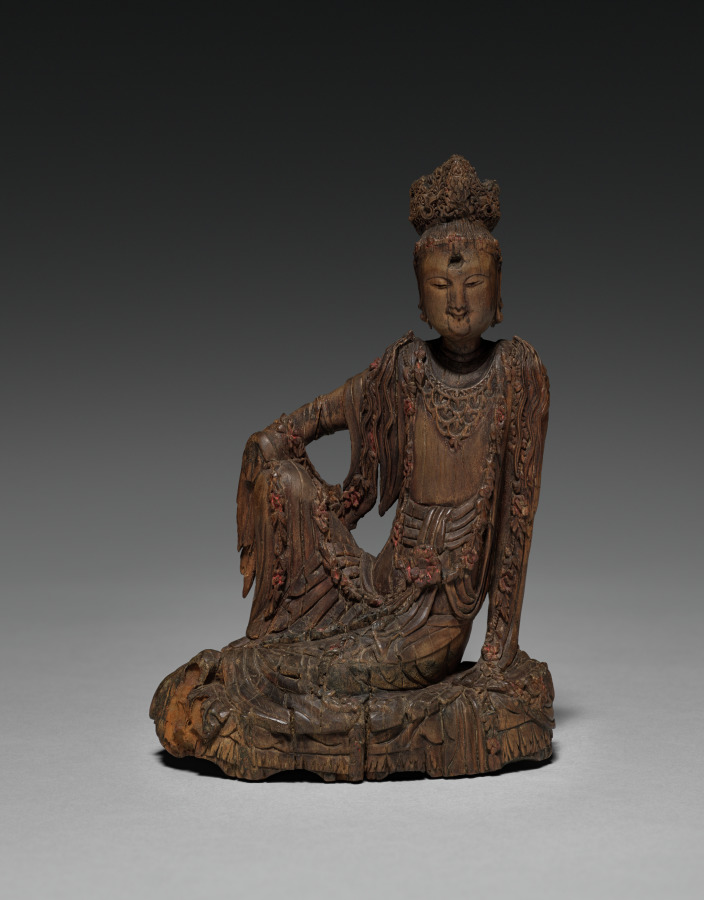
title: Potalaka Guanyin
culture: China, Five dynasties (907-960)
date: 900s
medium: Carved sandalwood with traces of paint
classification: Sculpture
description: This portable figure of Guanyin, the Bodhisattva of Compassion who vowed to stay on earth to help human beings, is carved of precious sandalwood. It is lavishly covered with garlands of flowers that retain traces of the original red paint. The small sculpture may have been used in a private devotional context.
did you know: Mount Potala is the mythical home of the bodhisattva Avalokiteśvara, called Guanyin in Chinese.